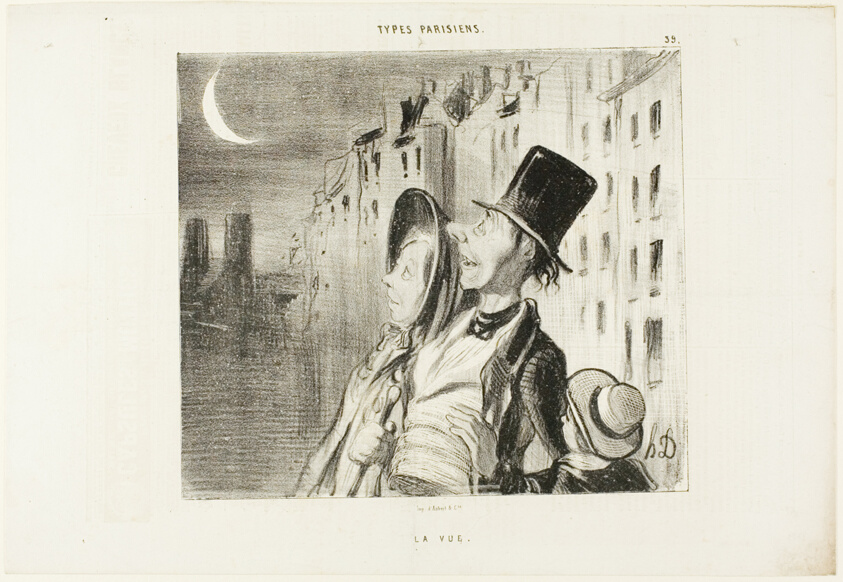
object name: Print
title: Sight, plate 39 from Types Parisiens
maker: Honoré Victorin Daumier; French, 1808-1879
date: August 4, 1839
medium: Lithograph in black on white wove paper, with letterpress verso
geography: France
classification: lithograph; print; prints and drawing